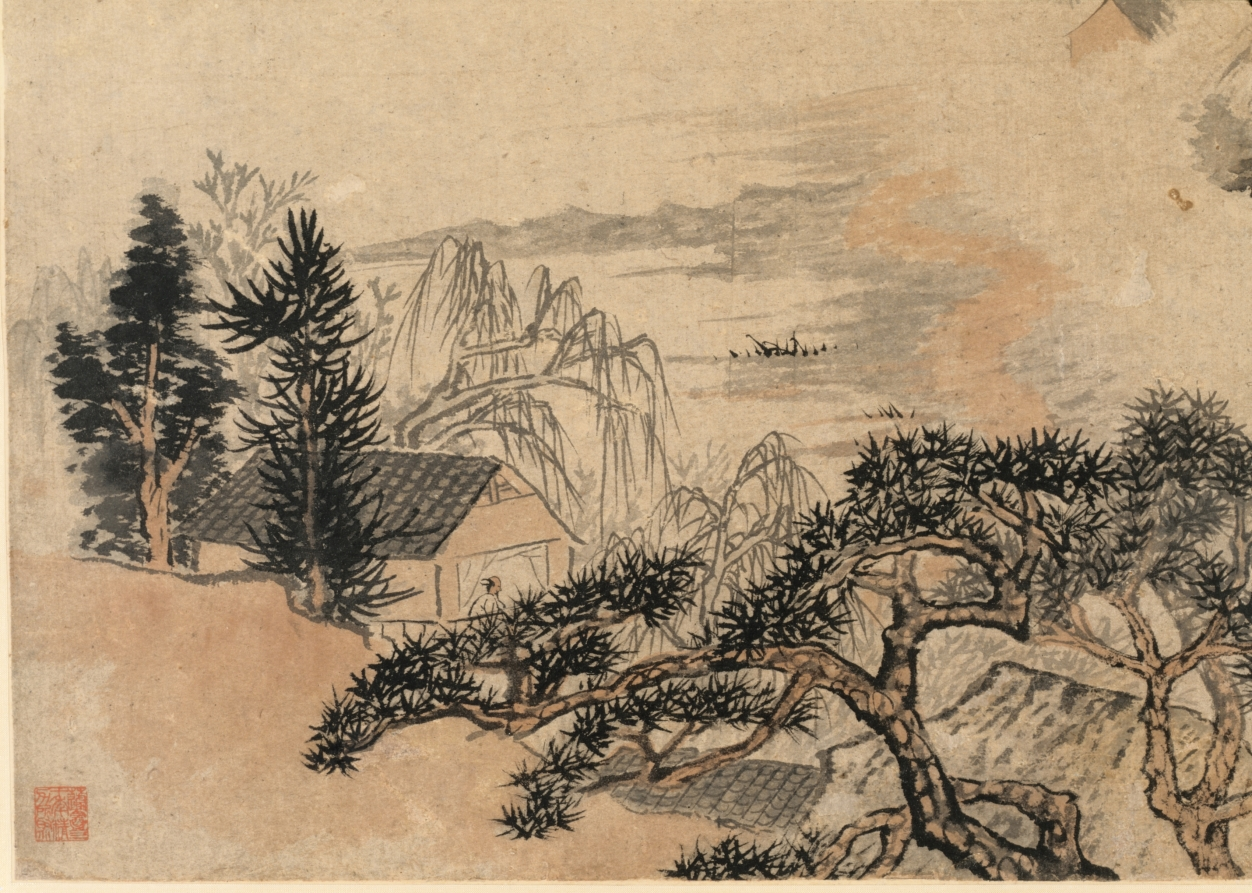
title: Spring Mist over Jiangnan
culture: China, Qing dynasty (1644-1911)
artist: Shitao (Chinese, 1642–1707)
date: 1697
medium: Hanging scroll; ink and light color on paper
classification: Painting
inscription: 揚子橋邊江水泛，柳絲弄色不管人白頭。/ 一春雨雪阻遊屐，梅花尚可清明留。/ 老去無聊藉朋輩，年來星散隨波鷗。/ 汪子無端向我發長嘯，吾將縱覧閩澥之奧妙。/ 請君置我先向畫圖看，眼前丘壑都一掃。/ 千里萬里毫端見，非墨非煙聊寄傲。/ 君家嚴親百代才，一言奏對驚風雷。/ 天子非常賜顏色，灜台稱旨今南來。/ 多少寒灰待君活，看君作意為龍媒。 丁丑春題畫，贈汪子牧庭之閩海。兼呈思白學使。清湘老人濟大滌堂下。[印]原濟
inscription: 2 colophons and 7 additional seals: 1 colophon and 4 seals of He Yuanyu 何瑗玉 (1840-?); 1 colophon and 2 seals of Li Xinhui (19th-20th c.); 1 seal unidentified.